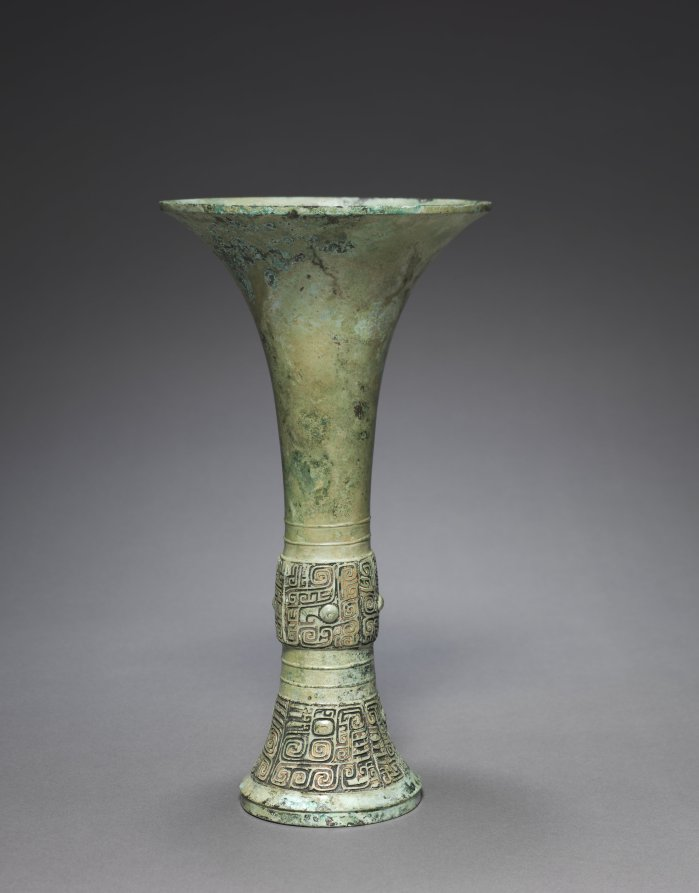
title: Wine Beaker (Gu)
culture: China, Shang dynasty (c. 1600–c. 1046 BCE), Anyang phase (c. 1250–1046 BCE)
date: c. 1200 BCE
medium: bronze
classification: Metalwork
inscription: cast on outside: "Ch'i (?) fu Chi."